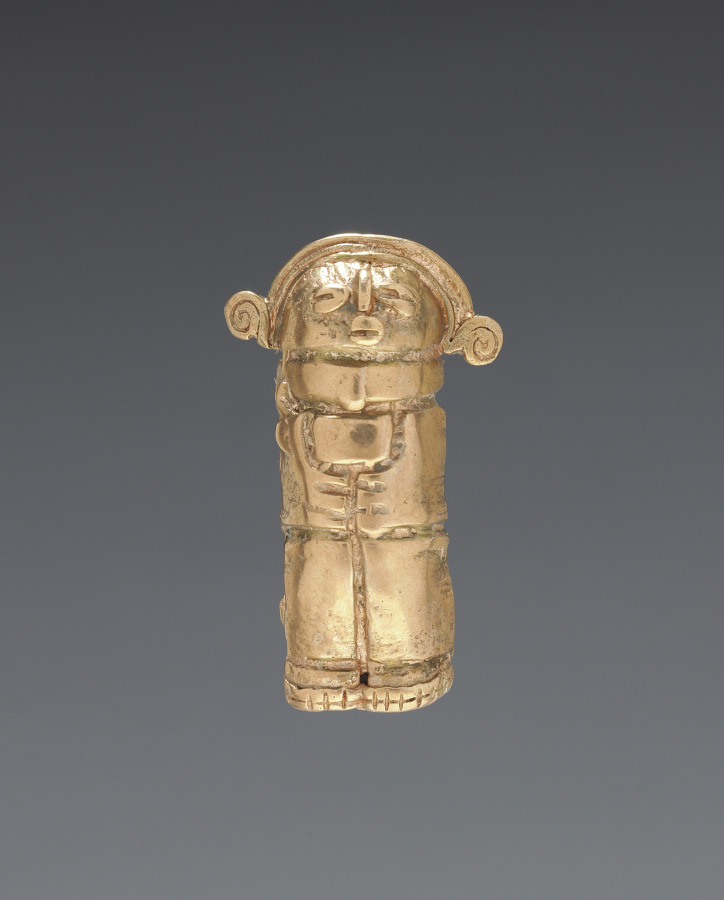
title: Necklace Figurine Bead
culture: Colombia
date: 1–700 CE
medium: cast gold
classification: Jewelry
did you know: Working with gold dates back to at least 500 BC in Ecuador and Colombia.